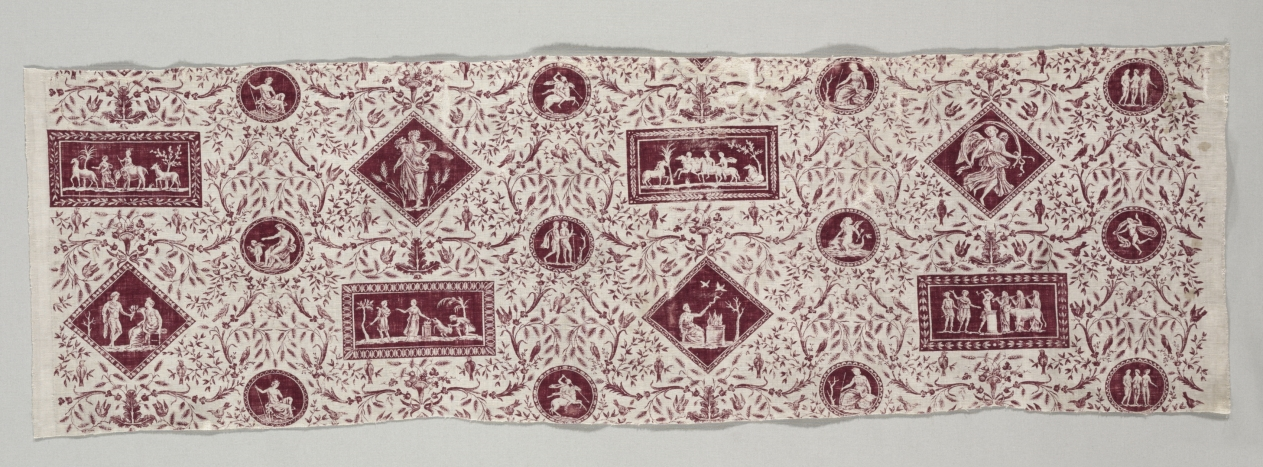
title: Strip of Copperplate Printed Cotton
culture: France, 18th century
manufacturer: firm of Christophe Philippe Oberkampf (French, 1738–1815)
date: 1795–1799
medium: copperplate printed cotton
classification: Textile